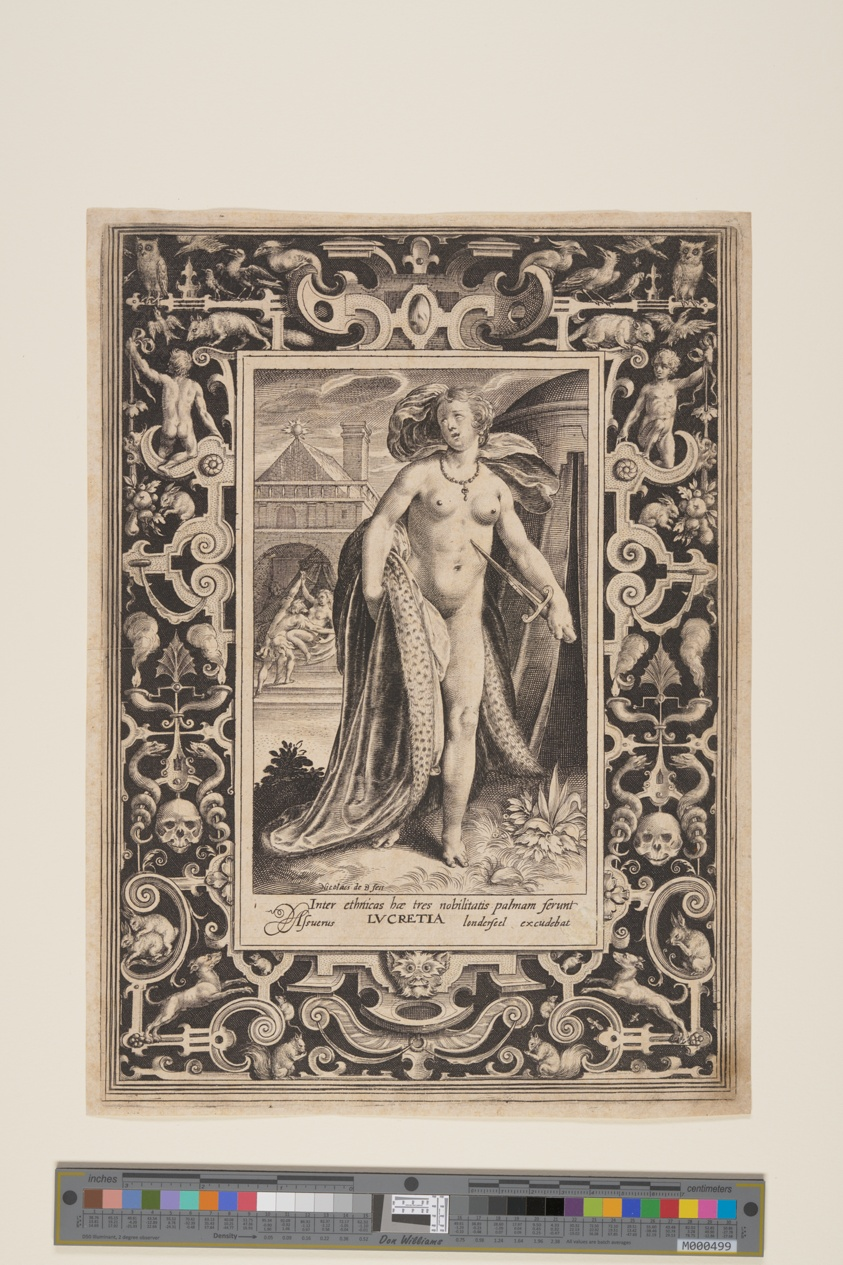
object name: Print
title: Lucretia, plate one from The Nine Worthies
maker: Nicolaes de Bruyn (Flemish, 1571–1656)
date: c. 1595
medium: Engraving on ivory laid paper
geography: Flanders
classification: print; paper; prints and drawing; engraving